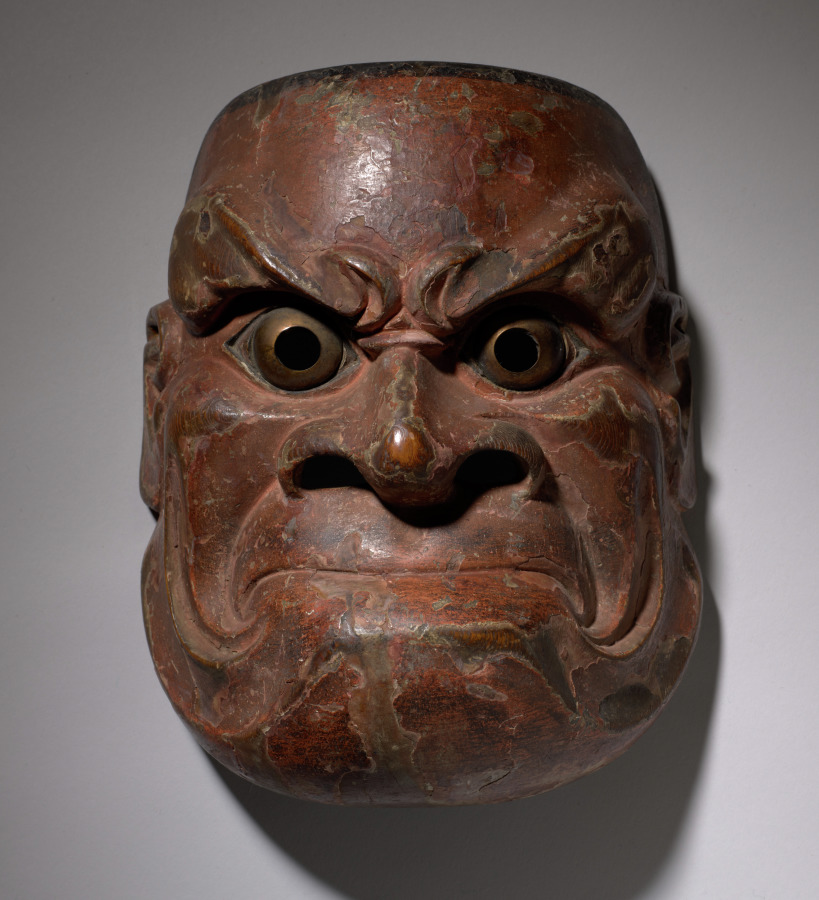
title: Noh Mask: Ko-beshimi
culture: Japan, Muromachi period (1392–1573)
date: 1392–1573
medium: wood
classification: Sculpture